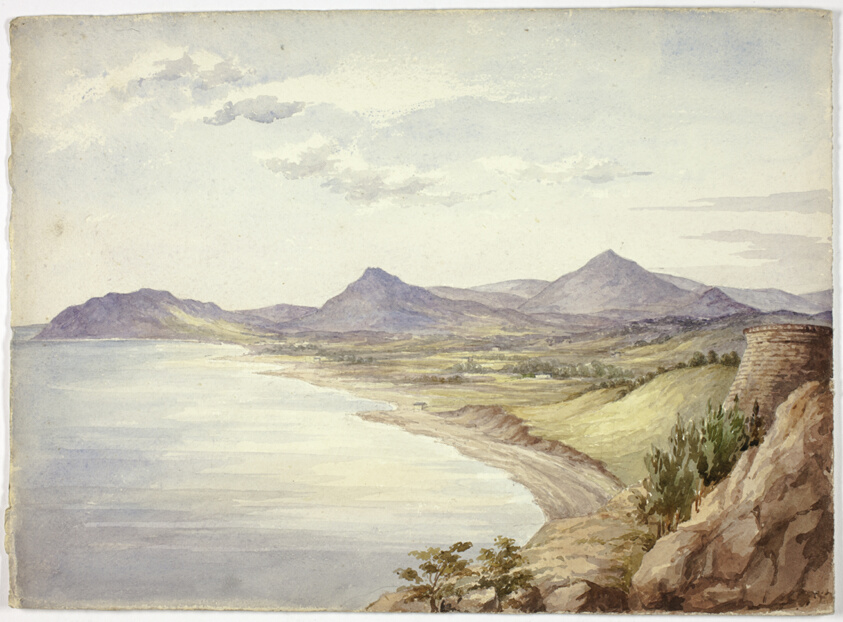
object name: Drawing and Watercolor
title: Victoria Castle and the Val of Shanganagh, Dún Laoghaire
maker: Elizabeth Murray (English, c. 1815-1882)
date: 1843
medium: Watercolor over traces of graphite on ivory wove paper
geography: England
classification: watercolor; drawings (visual works); prints and drawing